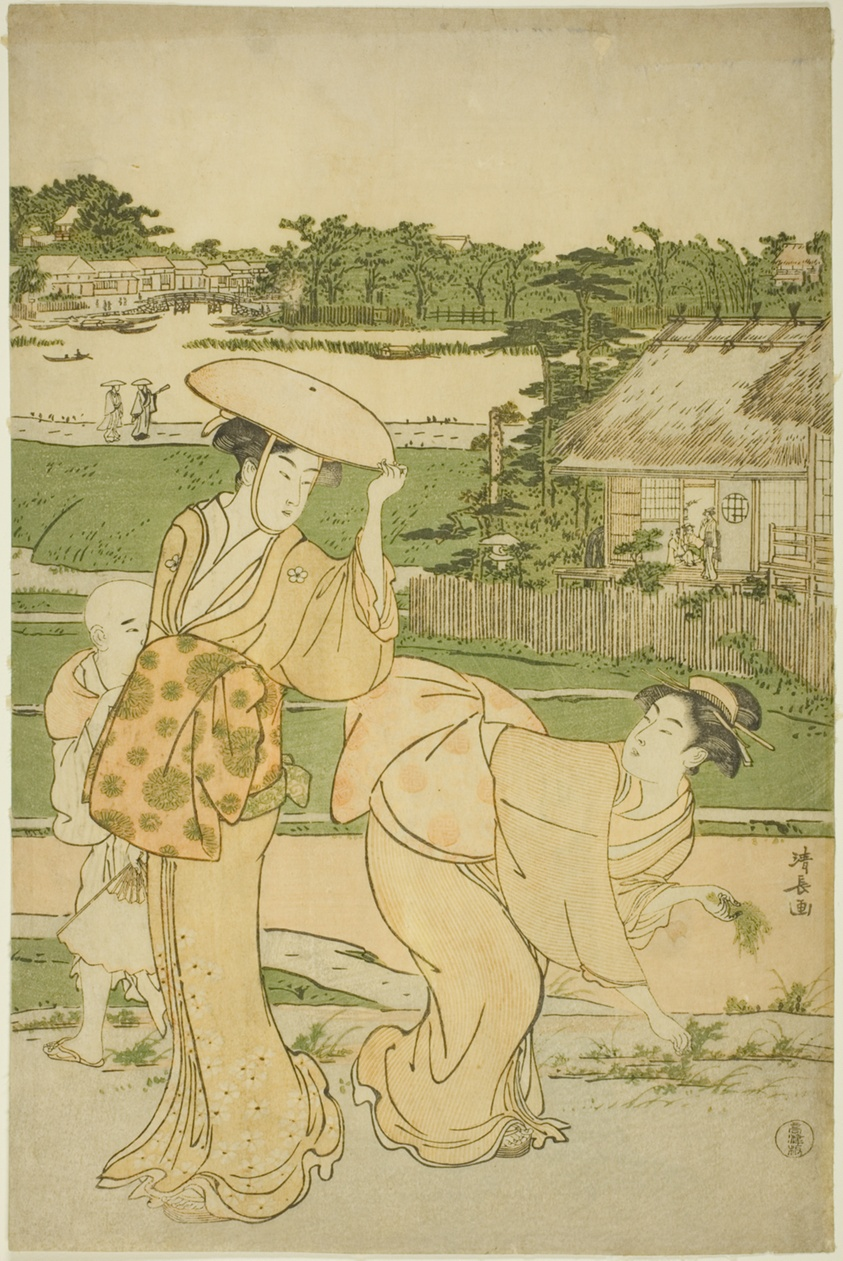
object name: Print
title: Spring Outing to Mukojima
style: Japanese (culture or style)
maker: Torii Kiyonaga (Japanese, 1752-1815)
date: c. 1787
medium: Color woodblock print; right sheet of oban triptych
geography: Japan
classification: woodblock print; print; asian art